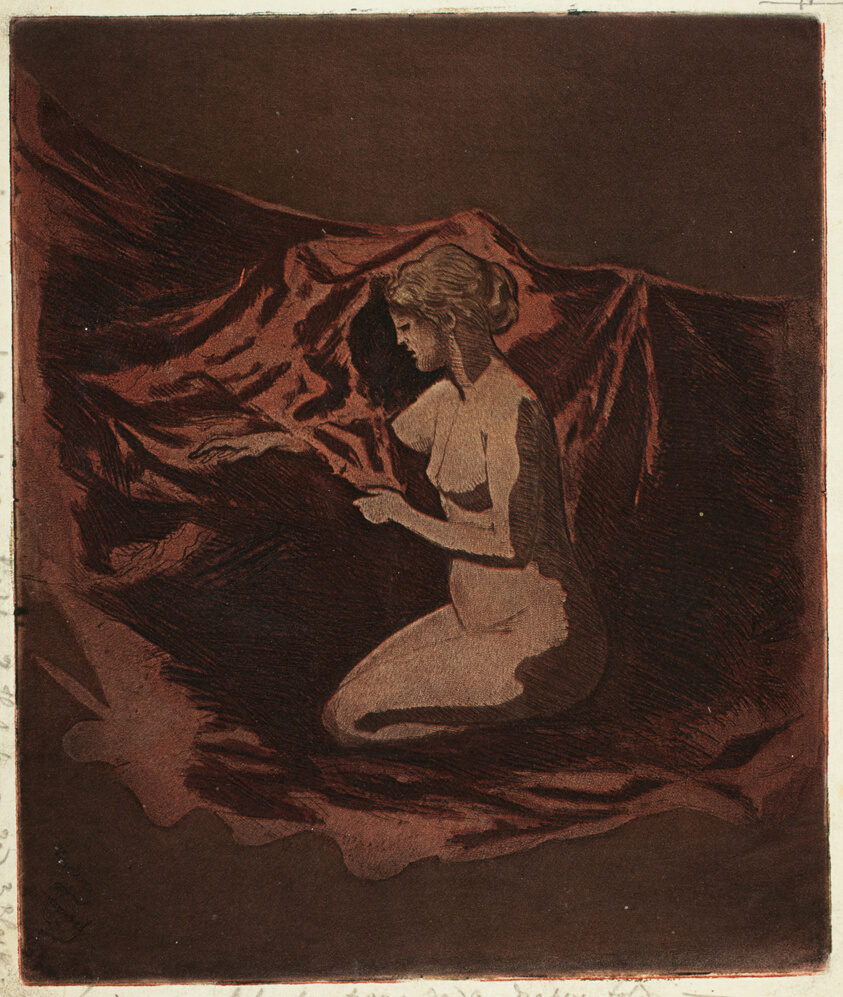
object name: Print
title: Embers Glow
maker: Theodore Roussel (French, worked in England, 1847-1926)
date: 1890–97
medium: Color etching and aquatint on cream (laid) Japanese paper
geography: England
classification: etching; aquatint; paper; print; prints and drawing